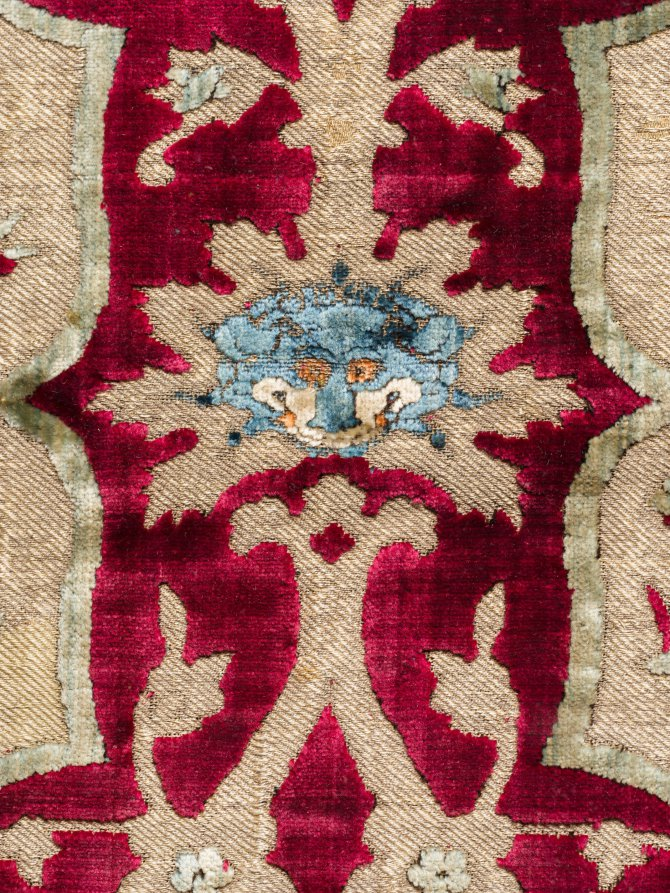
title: Fragment with falconer and attendant in animated lattice, from a robe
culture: Iran, Kashan, Safavid period (1501–1722)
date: mid-1500s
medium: Silk: velvet, brocaded, pile-warp substitution; gilt-metal thread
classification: Velvet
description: This velvet of Iran’s Safavid period (1501–1722) displaying a falconry scene is celebrated for its refined beauty and meticulous draftsmanship. A falconer and attendant flank a blossoming plant on a golden ground of lobed medallions. Animated vines display leaves bearing lion’s masks and dragons coiled around larger leaves on the crimson ground. Instead of two or three colors of velvet, Iranian weavers wove with as many as 14 colors, the most colorful velvets ever woven.